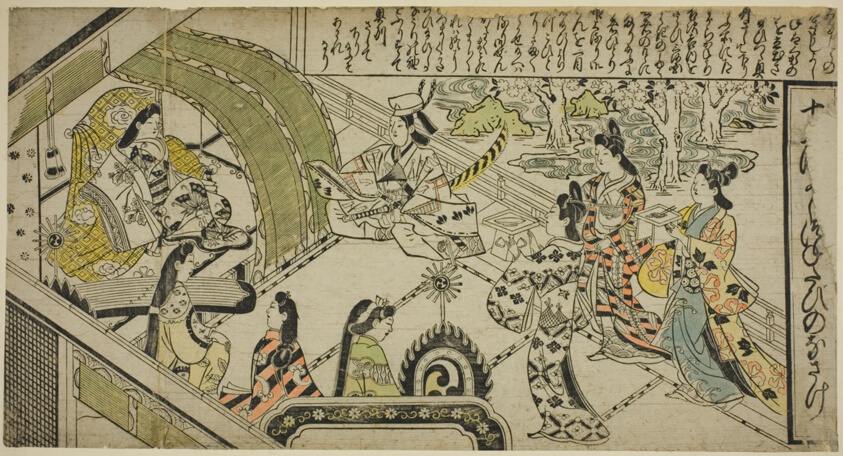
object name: Print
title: Yoshitsune's Encounter with Princess Joruri, from "The Tale of Joruri in Twelve Episodes (Joruri Junidan Zoshi)"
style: Japanese (culture or style)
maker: Sugimura Jihei (Japanese, active c. 1681-98)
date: c. 1684/1704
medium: Hand-colored woodblock print; o-oban, sumizuri-e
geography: Japan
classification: woodblock print; print; asian art